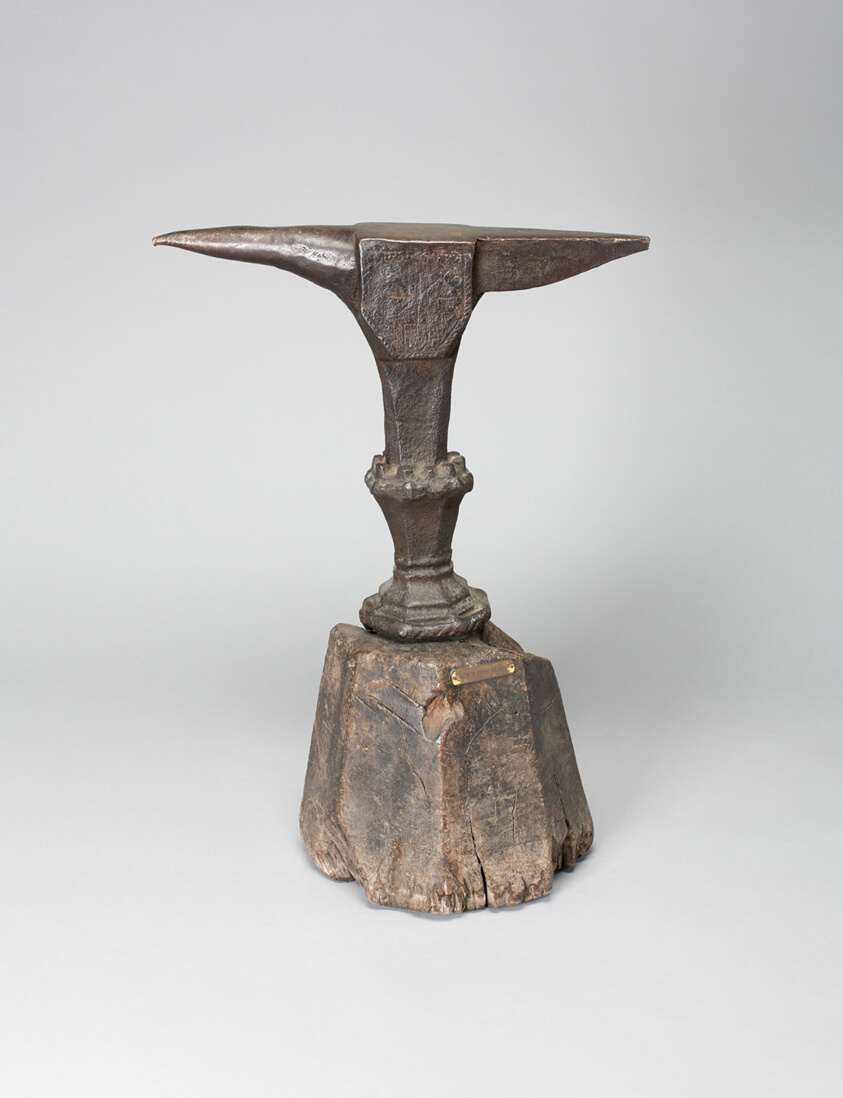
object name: Arms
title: Bickom (Anvil)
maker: European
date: 17th/18th century (?)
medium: Iron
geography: Europe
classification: arms and armor, miscellaneous; arms and armor; arms